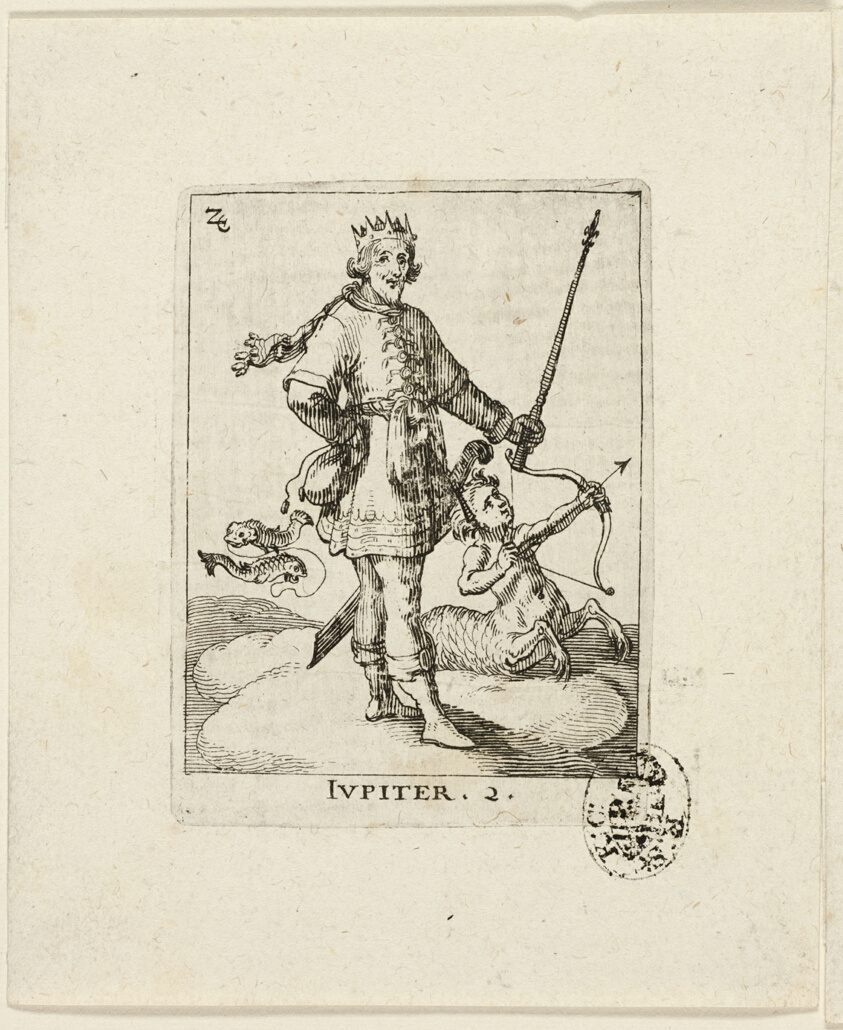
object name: Print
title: Jupiter, plate two from Der VII Planeten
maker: Conrad Meyer (Swiss, 1618-1689)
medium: Etching in black on ivory laid paper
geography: Switzerland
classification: etching; prints and drawing; print